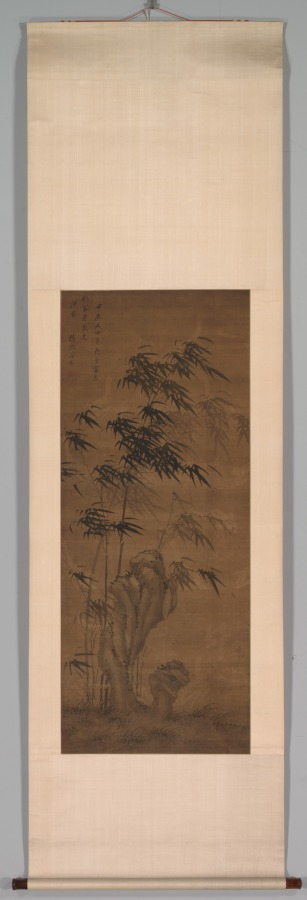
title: Bamboo in the Wind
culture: China, Qing dynasty (1644–1911)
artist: Ma Yu (Chinese, active 1706–1724)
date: 1724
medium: hanging scroll; ink on silk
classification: Painting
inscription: Artist's inscription and signature in upper left corner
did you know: In traditional Chinese culture, bamboo symbolizes a gentleman's virtuous resilience and flexibility.